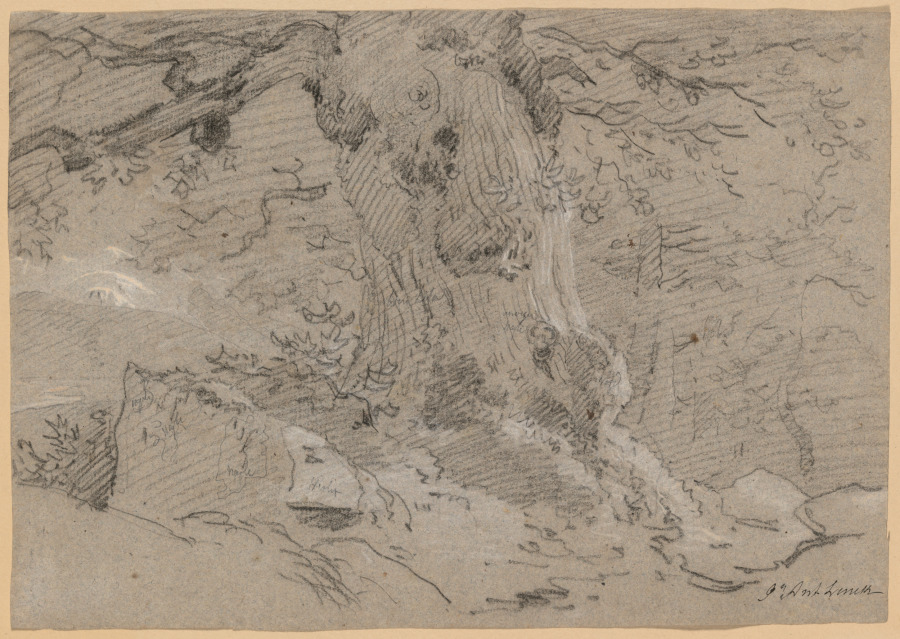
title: Study of Old Tree Trunk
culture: Switzerland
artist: Jean Antoine Linck (Swiss, 1766–1843)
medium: Black chalk with graphite heightened with white wash on gray paper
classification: Drawing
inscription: Lower right corner, black ink: Jn [n is superscript] Ant. Linck [cursive, signature]